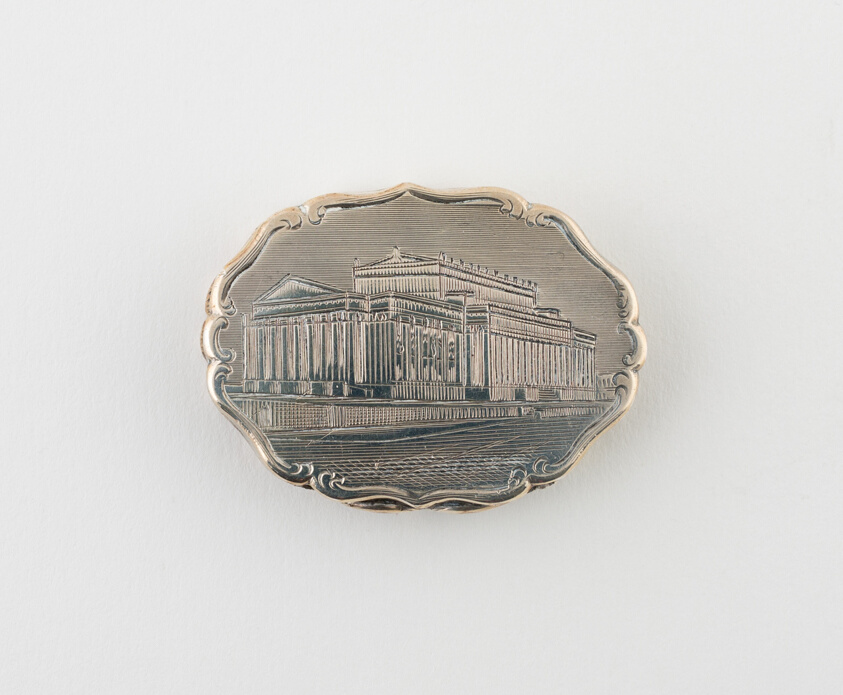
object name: Metalwork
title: Vinaigrette with View of St. George's Hall, Liverpool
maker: Marked DP; Birmingham, England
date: c. 1847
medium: Silver and silver gilt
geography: Birmingham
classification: container for personal use; vinaigrette (container for health care); european decorative arts; metalwork; silver; decorative object/ornament